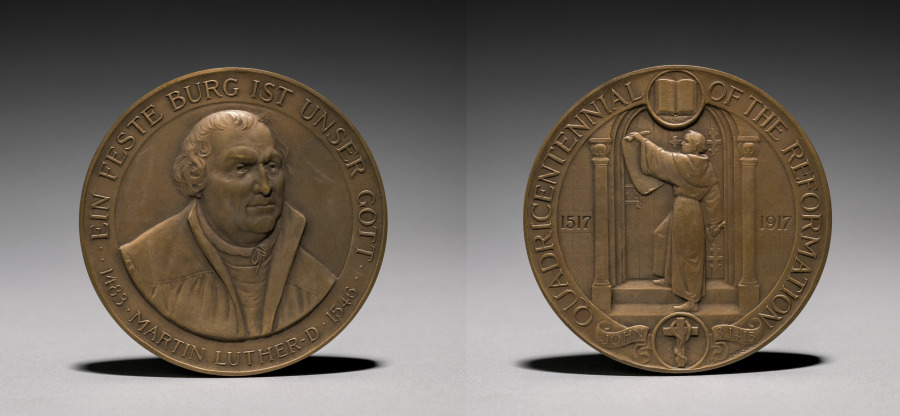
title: Medal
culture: America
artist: Jonathan M. Swanson (American, 1888–1963)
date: 1917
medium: bronze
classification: Metalwork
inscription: "1517 - 1917" (on each side of the door); "Quadricentennial of the Reformation."